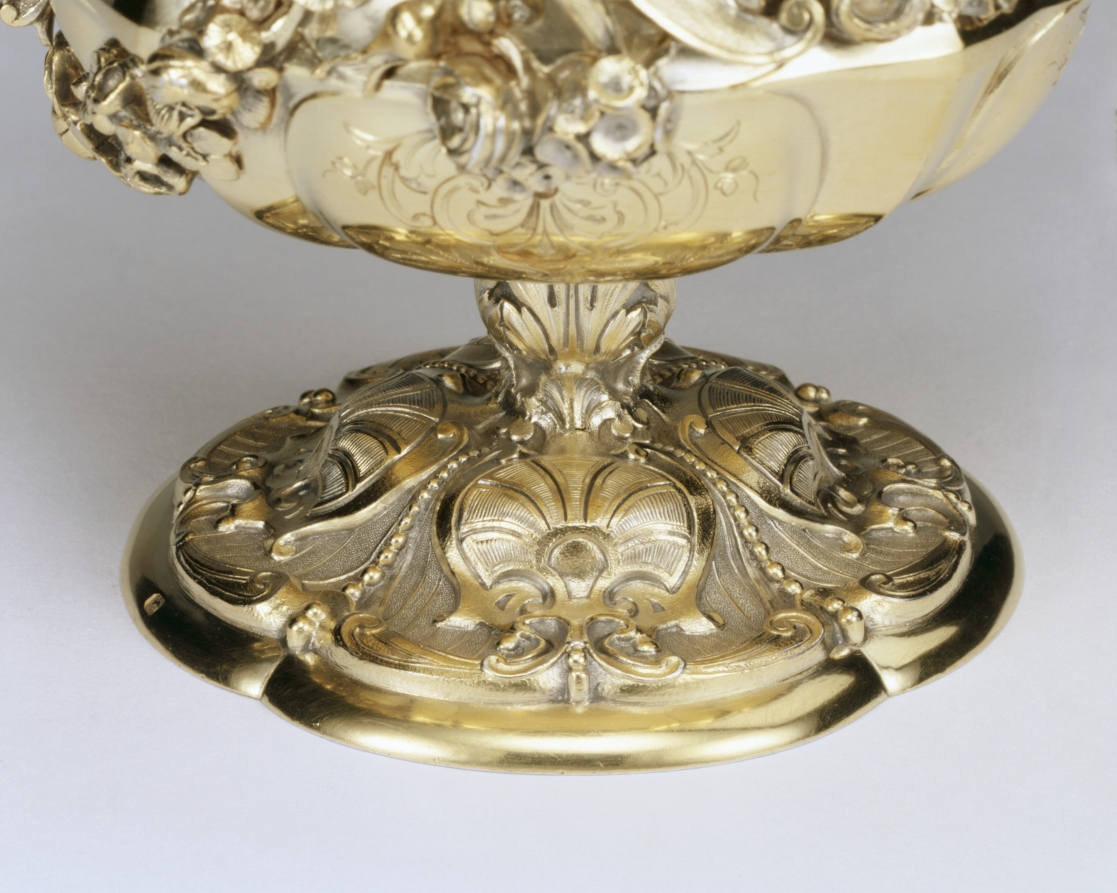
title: Covered Jug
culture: France, 19th century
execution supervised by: Jean-Valentin Morel (French, 1794–1860)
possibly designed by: Jules Dieterle (French, 1811–1889)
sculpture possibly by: Jules Klagmann (French, 1810–1867)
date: c. 1845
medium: gilded silver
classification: Silver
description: The elegance and richness of this ewer demonstrate the high level of technical mastery achieved by its maker. Morel studied under his father, a Parisian lapidary (someone who cuts, polishes, and engraves hard stones), and with Adrien Vachette, a maker of gold boxes. In 1842 he went into partnership with Charles-Edmond Duponchel, which lasted until the late 1840s, at which time he established himself in London, remaining there until 1852, when he returned to Paris. Morel frequentlyfollowed the designs of others, and it has been suggested that in the case of this pitcher his well-known contemporary, Jules Dieterle (1811-1889), may have conceived the overall form. The female figure seems to have been based on a design by the sculptor Jules Klagmann (1810-1867).